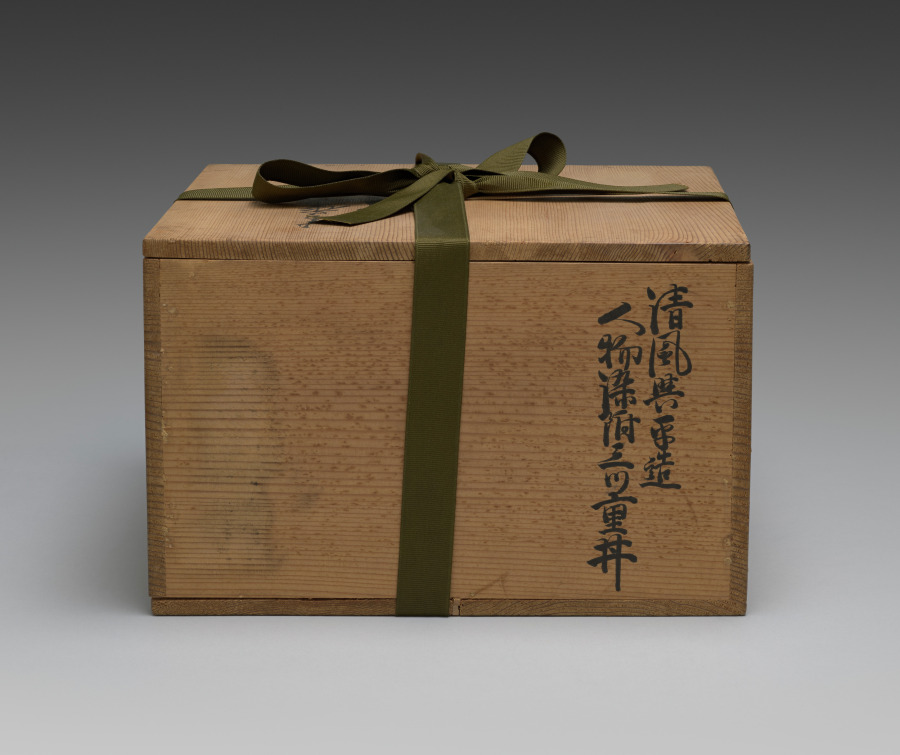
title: Nesting Bowls with Daoist Immortals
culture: Japan, Meiji period (1868–1912)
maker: Seifū Yohei III (Japanese, 1851–1914)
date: 1893–1914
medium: Set of three bowls; porcelain with underglaze blue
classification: Ceramic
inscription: 清風与平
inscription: 大日本清風造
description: Yohei III was capable of ink painting–like compositions in underglaze blue, as well as more decorative ones like that on this set of three nesting bowls. Bowls with very similar designs in five colors were produced in the reign of the Wanli emperor (r. 1572–1620) during the Ming dynasty, and Yohei must have had direct access to one of these or to a close copy. A scene of Daoist immortals is presented on the bowls. On each one, the ground plane is defined with a blue wash. Four lanterns are evenly spaced around the bowl. Two are flanked with linked-piece metalwork banners of the seven treasures. The alternate altars are adorned with textile banners. In between them are four immortals, each standing beneath a tree with small plants surrounding his feet. Two of the immortals hold fruit on a tray. Another carries an elixir-filled ewer and a willow branch. The fourth holds a swastika (manji), here an auspicious symbol, and a flower. Curiously, the inscription inside each footring reads “Made by Seifu of Great Japan,” in emulation of the dynasty and reign inscriptions that appear on Chinese ceramics; however, one can also see through the translucent glaze another inscription, “Seifu Yohei,” written in large characters within a double band of blue on the largest bowl.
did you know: In the bottom of each bowl is a scene of two robed immortals who appear to stand on a precipice in a mountainous landscape high in the clouds, with celestial orbs over their heads.